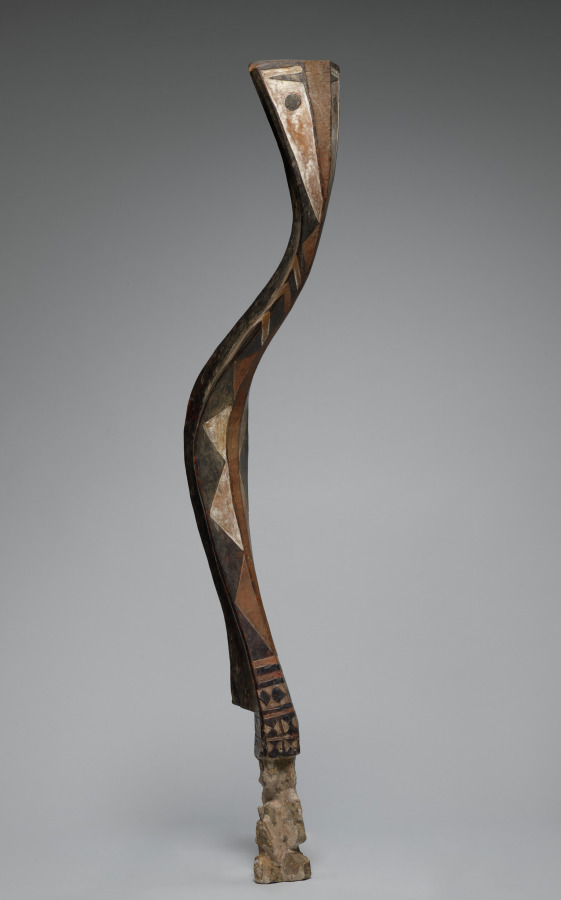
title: Serpent Headdress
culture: Africa, West Africa, Guinea, possibly Baga-style maker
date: late 1800s–early 1900s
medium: Wood (Nauclea pobeguinii) and paint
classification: Mask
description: Traditionally, Baga society was ruled by village councils of elders who derived their power from their direct contact with spirit entities through lifelong initiation rituals and the accumulation of secret knowledge. Two different religious orders controlled initiations, providing the context for much Baga art. One was identified as female, the other as male, though only men belonged to both groups. Initiations in each order followed three stages, culminating in the revelation of the highest spirit being. This type of Baga headdress embodied the serpent spirit Ninkinanka, honored for giving rain, bestowing riches, and bringing forth children. The serpent figure would be placed on top of a conical framework of palm branches carried on a male dancer’s head. It appeared at the end of the first level of the initiation for boys and girls or just before the circumcision at the beginning of the boys’ initiation.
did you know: In the context of boys' initiations, the serpent headdress was sometimes identified as the rainbow, which the Baga and their neighbors associate with beginnings and endings, life and death, and the continuation of lineages.